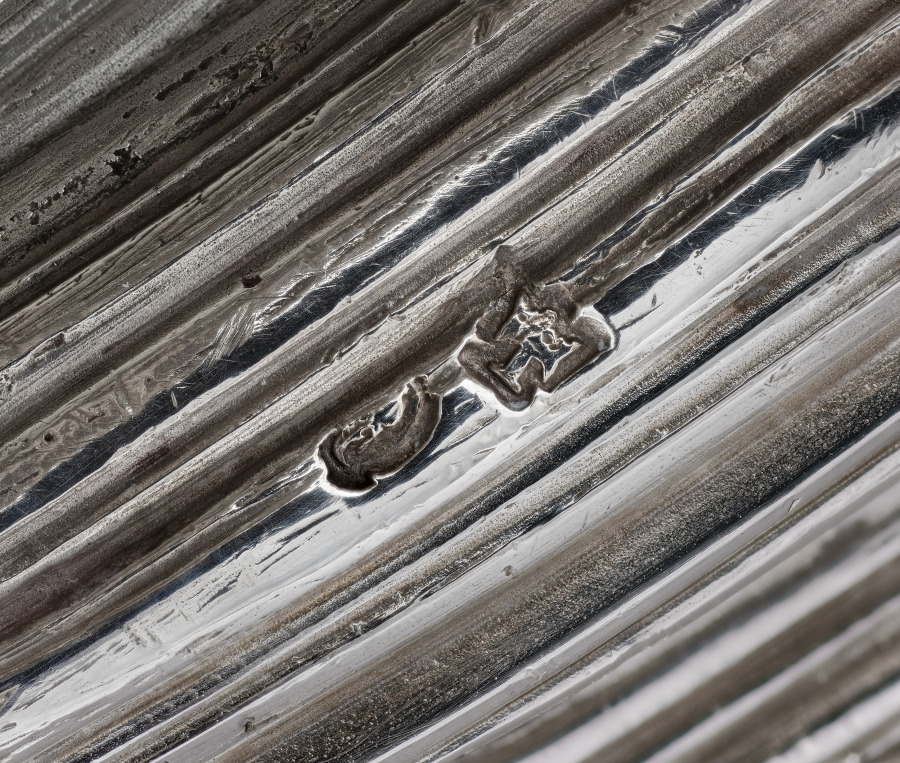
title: Tureen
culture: France, Paris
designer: Juste-Aurèle Meissonnier (French, 1695–1750)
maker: Pierre-François Bonnestrenne (French)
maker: Henry Adnet (French, 1745)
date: 1735–38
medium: silver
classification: Silver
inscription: engraved Meissonnier signature.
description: See entry for cover record 1977.182.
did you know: The langoustine, pigeon, and vegetables were cast using real examples giving the silver copies lifelike detail and appearance.